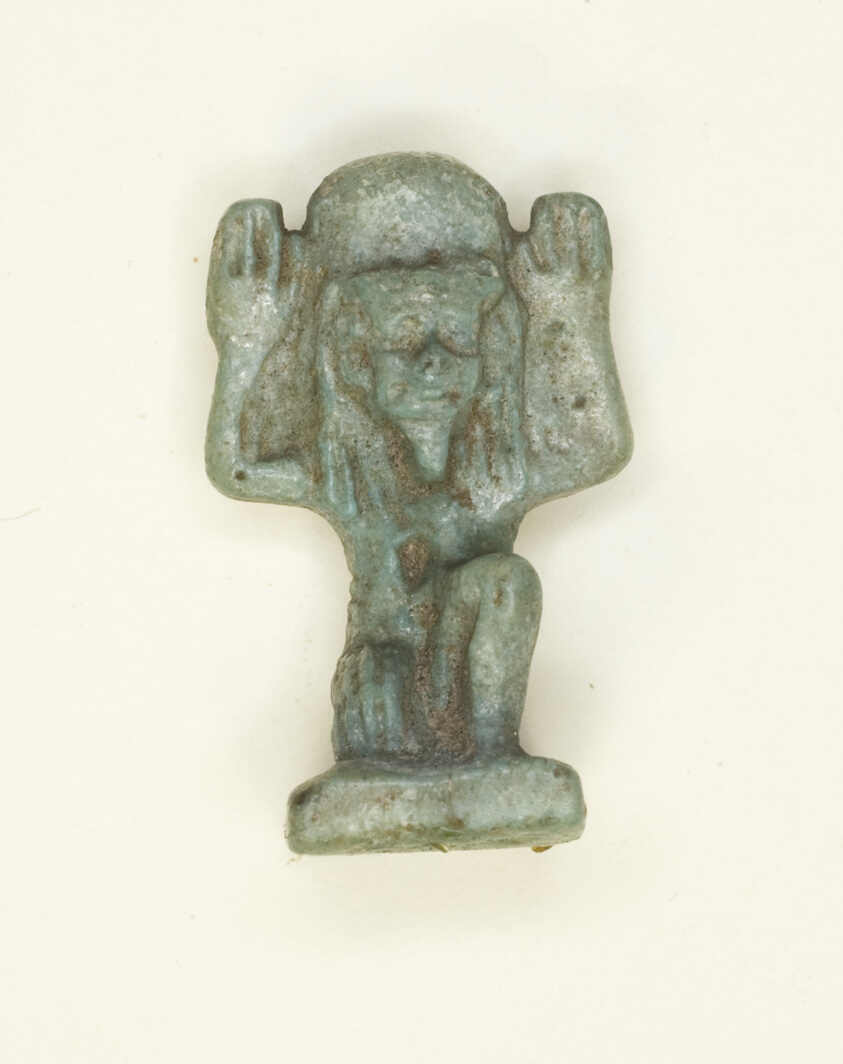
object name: Costume and Accessories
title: Amulet of the God Shu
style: egyptian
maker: Egyptian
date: Late Period, Dynasty 26–31 (664–332 BCE)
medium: Faience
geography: Egypt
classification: amulet; jewelry; ceramics; ancient art; costume; faïence (composite material)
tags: gods (deities)